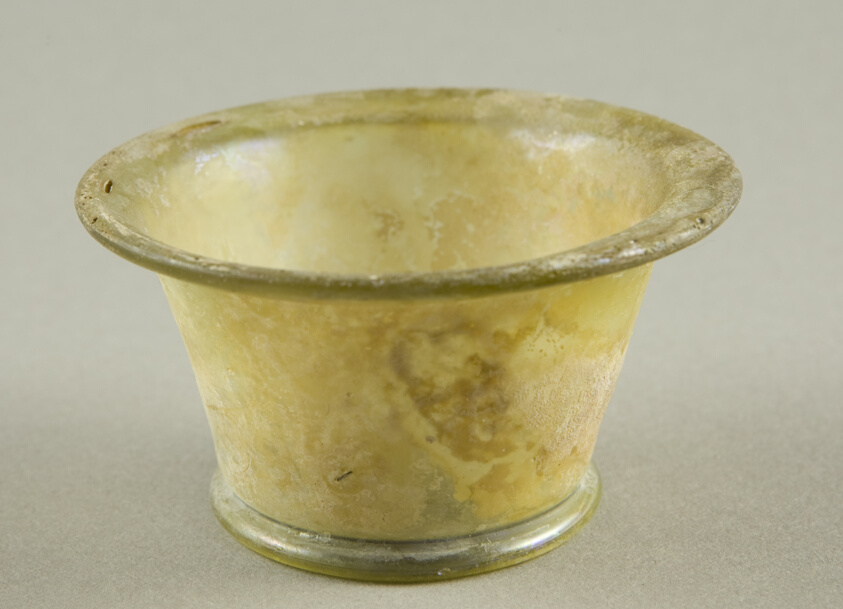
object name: Vessel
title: Bowl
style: roman (ancient, style or period), ancient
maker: Roman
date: 1st-2nd century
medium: Glass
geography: Italy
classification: glass; vessel; ancient art